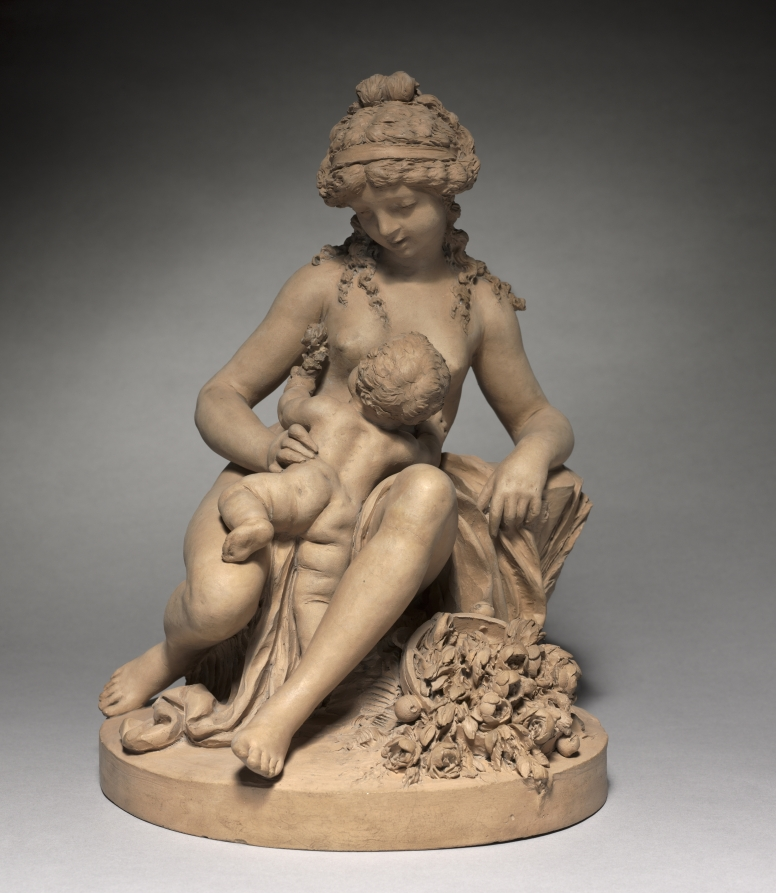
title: Young Woman and Child at Play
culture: France, 18th century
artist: follower of Clodion (French, 1738–1814)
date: 1780s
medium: terracotta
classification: Sculpture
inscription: inscribed: Clodion.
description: The French sculptor Claude Michel, called Clodion (1738–1814), constructed much of his work in terracotta. After firing, the unglazed color of the clay can vary widely, so each of Clodion's works in this medium has a slightly different hue, in this case a smooth reddish gray. Clodion depicts a mother nursing her newborn with painstaking attention to detail, from the tendrils of hair that cascade gracefully down to the mother's shoulders to the brilliant bouquet at the pair's feet.